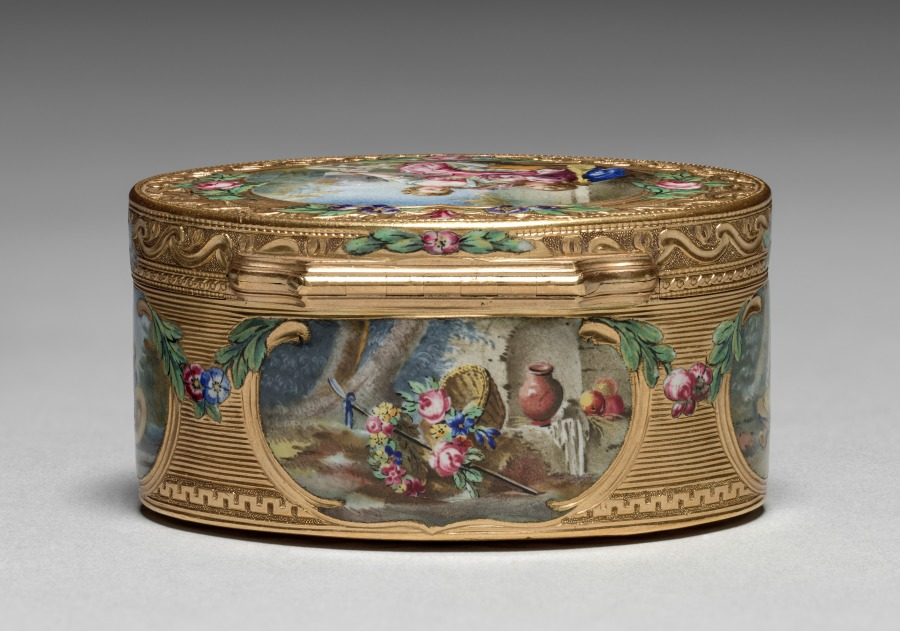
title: Snuff Box (Tabatière)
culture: France, 18th century (style of Louis XV)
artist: Francois Guillaume Tiron (French)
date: 1761–62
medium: gold and enamel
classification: Miscellaneous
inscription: [Maker's mark of Francois-Guillaume Tiron, master goldsmith in 1747, inside cover]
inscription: [Warden's mark, Paris, 1761-1762, inside cover]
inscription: [Charge mark of Eloi Brichard and Etienne Somfoye, Paris, 1756-1762, inside cover]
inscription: [Maker's mark of Francois-Guillaume Tiron, inside bottom]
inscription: [Warden's mark, 1761-1762, inside bottom]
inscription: [Charge mark of Brichard and Somfoye, inside bottom]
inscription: [Maker's mark of FG Tiron, left wall]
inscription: [Charge mark of Brichard and Somfoye, left wall]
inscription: [Warden's mark, Paris, 1761-1762, left wall]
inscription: [Discharge mark of J.J. Prevost, Paris, 1762-1768, bezel at right]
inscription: [Engraved number, maybe retailer's number]: "n. 13676"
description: The pastoral scenes that decorate this box are typical of the style of François Boucher, a celebrated painter of the period whose works were popularly reproduced on decorative arts. Snuff boxes, used practically as containers for powdered tobacco, were often decorated with miniature reproductions of notable works. The miniature on the cover is inspired by Boucher’s The Galant Pastor (Le Pasteur Gallant) (1738) and that on the bottom by The Amusement of the Shepherd Girl (L’Amusement de la Bergère) (1700s).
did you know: François Boucher was a favorite of the French royal court of Louis XV and named first painter of the king in 1765.